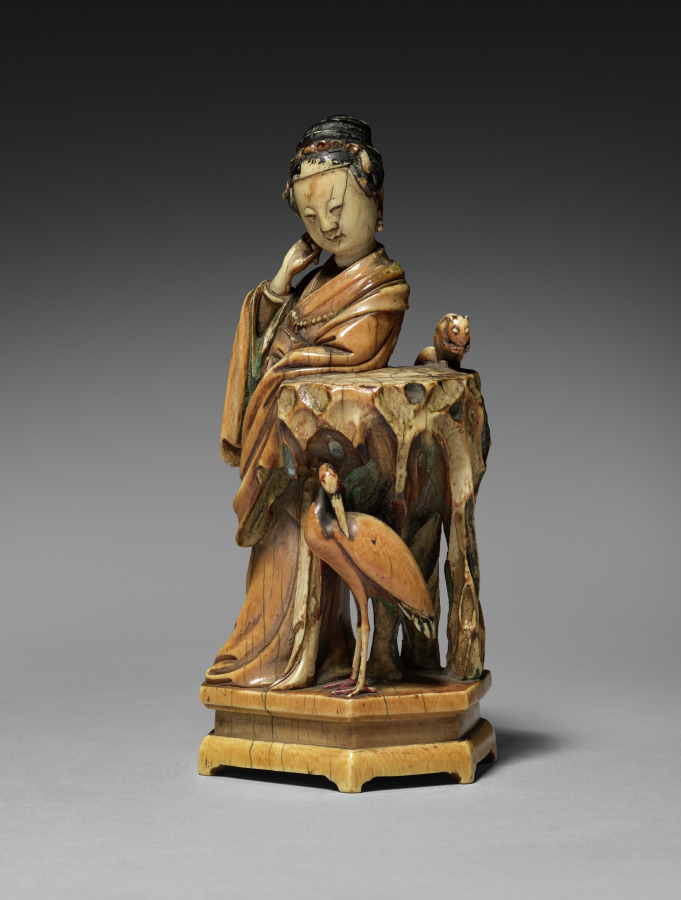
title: Female Figure with Crane and Squirrel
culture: China, Qing dynasty (1644-1911), Kangxi reign (1662-1722)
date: 1662–1722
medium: ivory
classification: Ivory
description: In the Qing dynasty (1644–1911), luxury items became more affordable to larger parts of the society, including women, merchants, and literati in non-official positions. Imperial patronage and a growing urban population encouraged consumption of luxury goods and local craftmanship. This ivory form of a woman with a crane illustrates the superb skills and the creative mind of the talented artisan who sought clients on a competitive market.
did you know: The ivory has aged to a rich amber, while traces of its original red and green paint remain on the woman’s cuffs and collar.